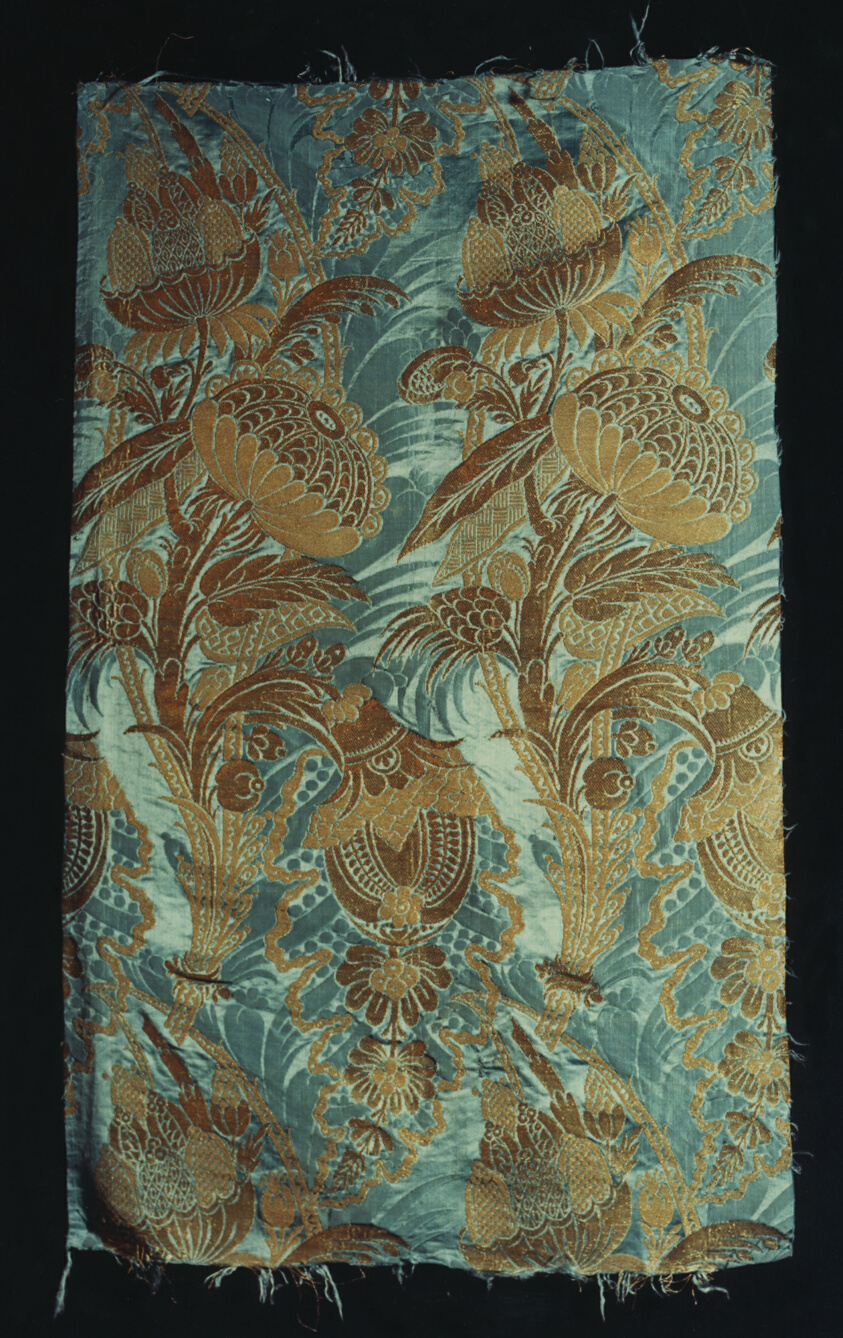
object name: Textile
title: Panel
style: "bizarre" style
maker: France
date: 1700/25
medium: Silk and gilt-metal-strip-wrapped silk (filé and frisé), warp-float faced satin weave with supplementary brocading wefts bound in weft-float faced twill intelacings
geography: France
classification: textile; weaving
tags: foliage, flowers, fruit